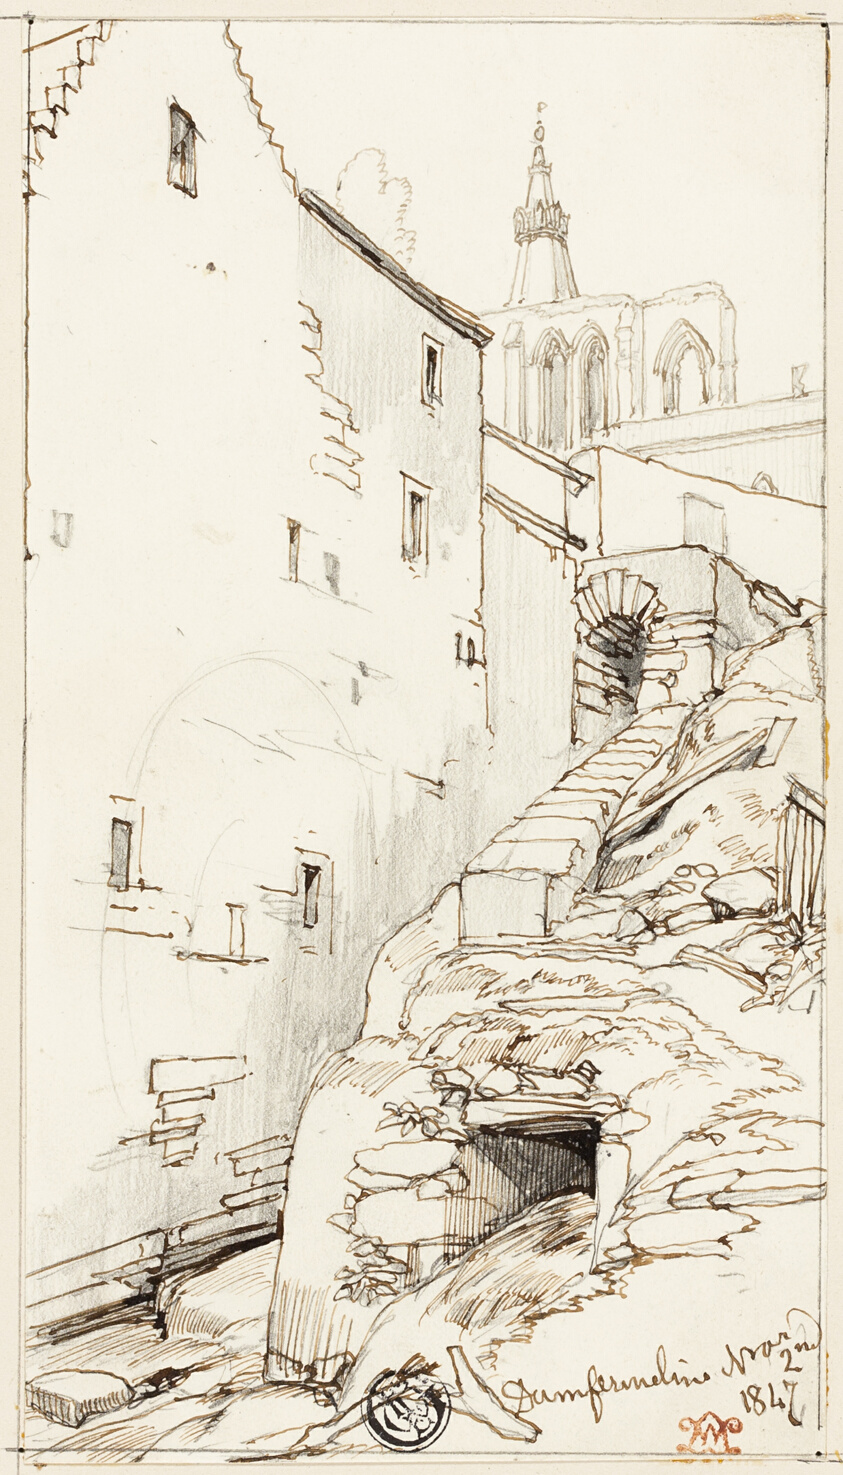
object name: Drawing and Watercolor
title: Dunfermline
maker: William Leighton Leitch (Scottish, 1804-1883)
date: March 2, 1847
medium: Pen and brown ink and graphite on ivory wove paper, laid down on board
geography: Scotland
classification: pen and ink drawings; drawings (visual works); prints and drawing